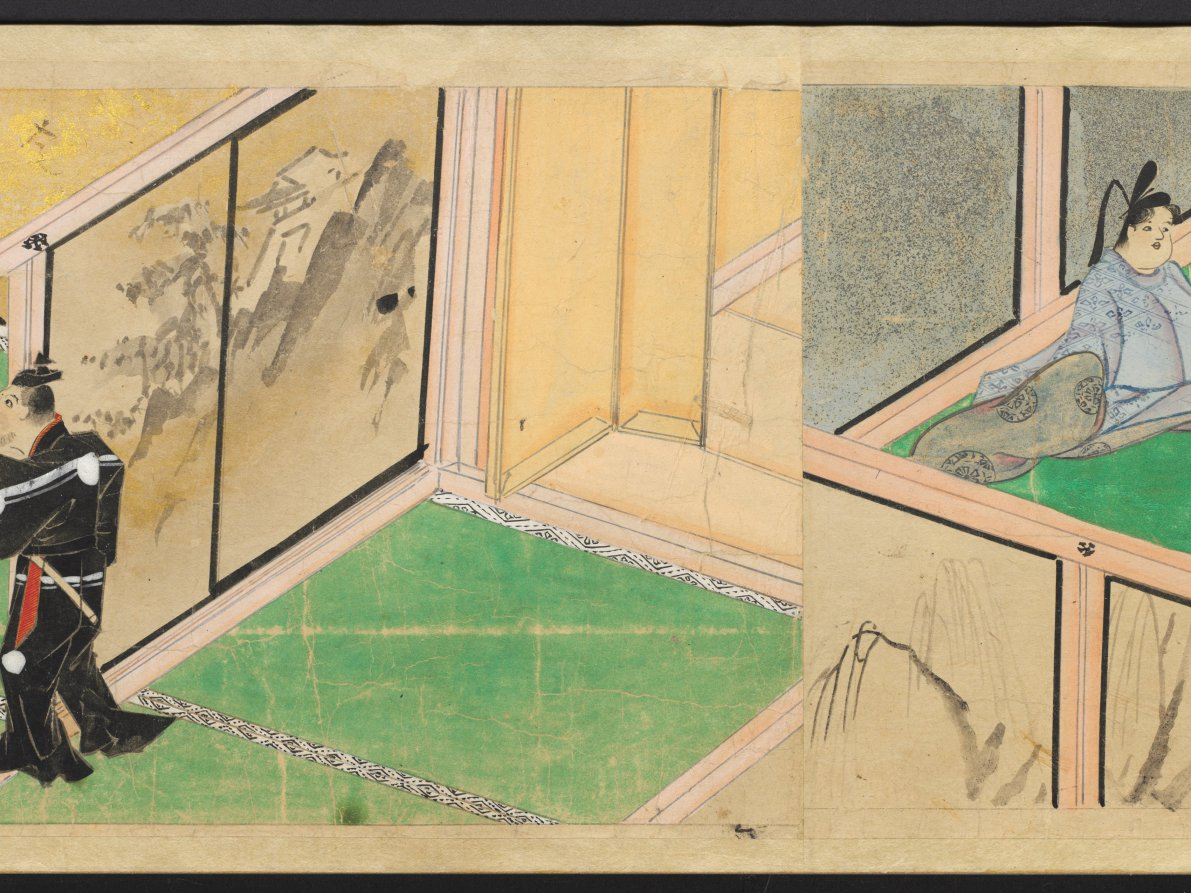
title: The Saltmaker's Story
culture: Japan, Edo period (1615–1868)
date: early 1600s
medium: One of a pair of handscrolls; ink, color, and gold on paper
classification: Painting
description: Once read and copied by girls at New Year’s celebrations and included in dowries, The Saltmaker’s Story is a rags-to-riches tale in which daughters are gifts from the gods. Despite his simple outlook, the main character progresses from humble roots as an associate at Kashima Shrine to the elite status of grandfather of the emperor through the intervention of the Kashima deity. The Saltmaker’s Story is traditionally presented in a set of three scrolls, but the text of this set has been removed by a previous owner, who remounted the illustrations as a pair. The paintings of this one take us from right to left through the second half of the tale.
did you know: This handscroll originally had texts before its paintings, but the texts were removed.